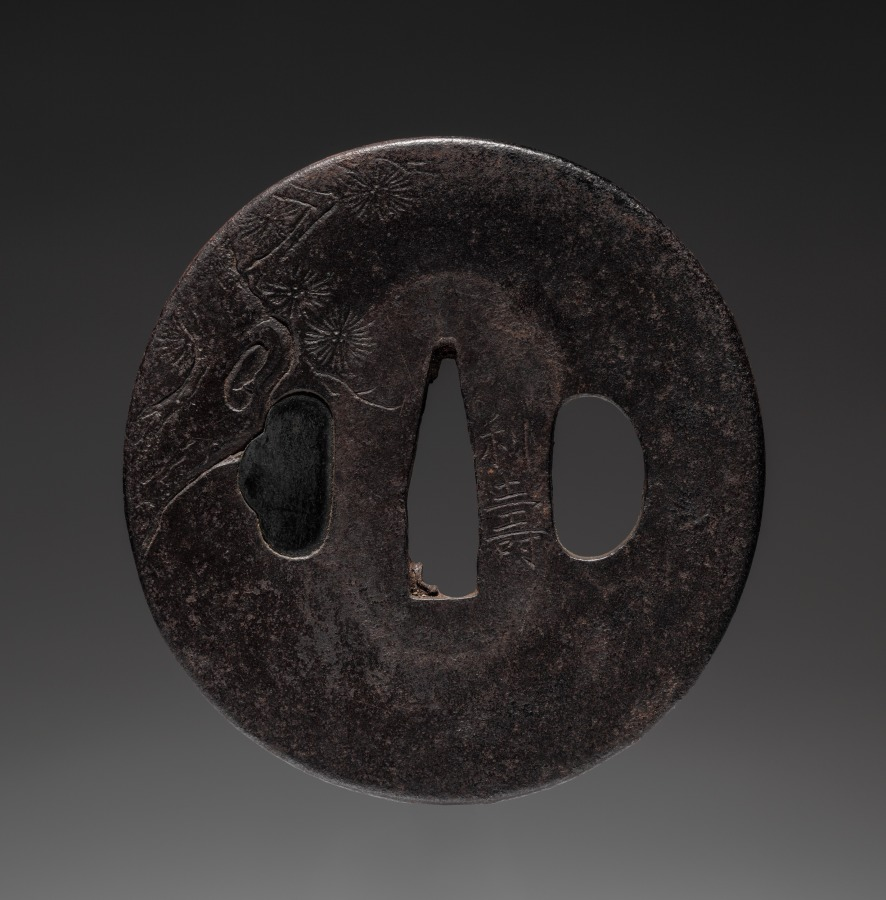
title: Sword Guard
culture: Japan, Edo period (1615–1868)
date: early 1700s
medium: iron (Nara type)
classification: Arms and Armor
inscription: signed "Toshinaga" [1669-1736].